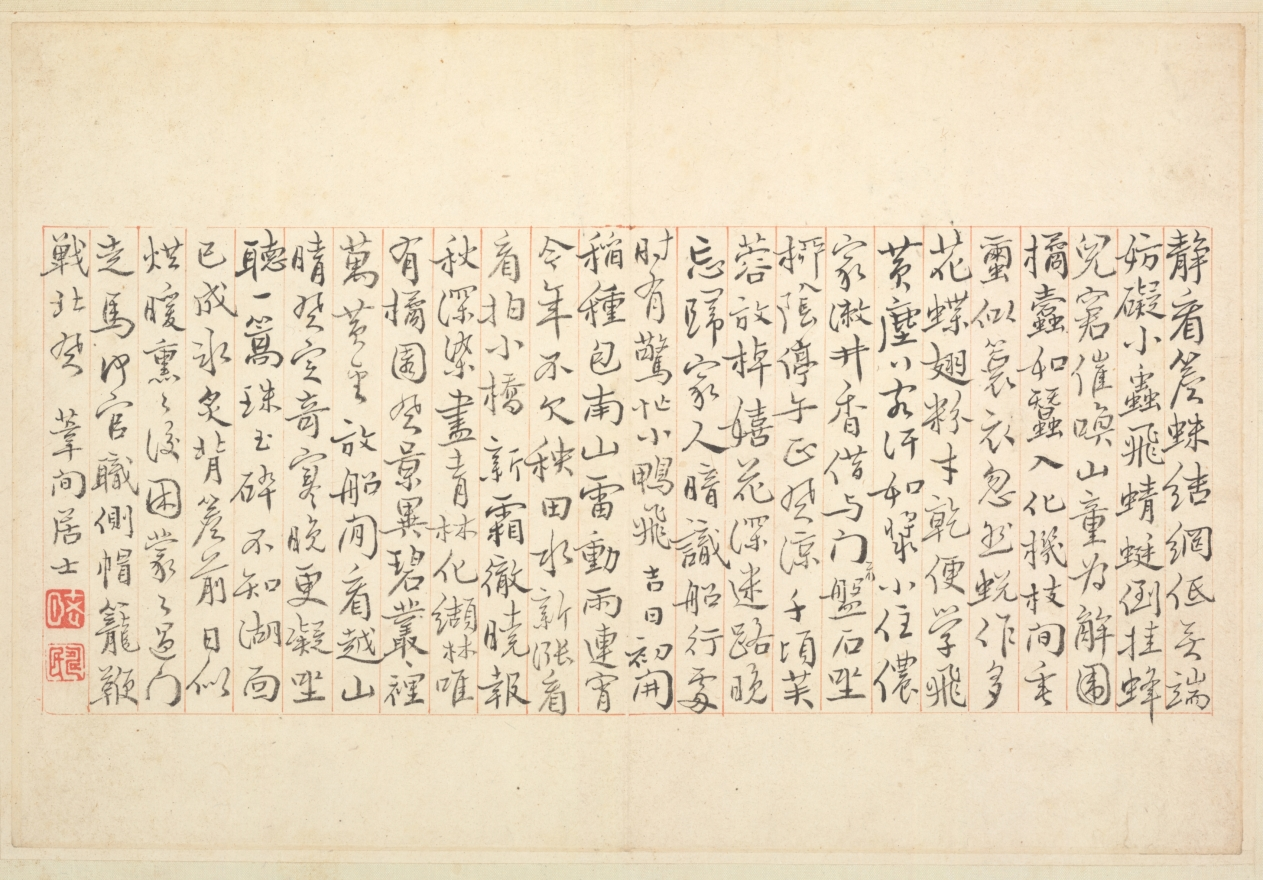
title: Album of Calligraphy and Paintings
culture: China, Qing dynasty (1644-1911)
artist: Bian Shoumin (Chinese, 1684–1752)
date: first half of the 1700s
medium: album leaf; ink and color on paper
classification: Painting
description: The artist Bian Shoumin is known for his depiction of wild geese, water, and reeds. The migrant birds in autumn and winter evoked, in the minds of the Chinese intelligentsia, a time of parting and sorrow.